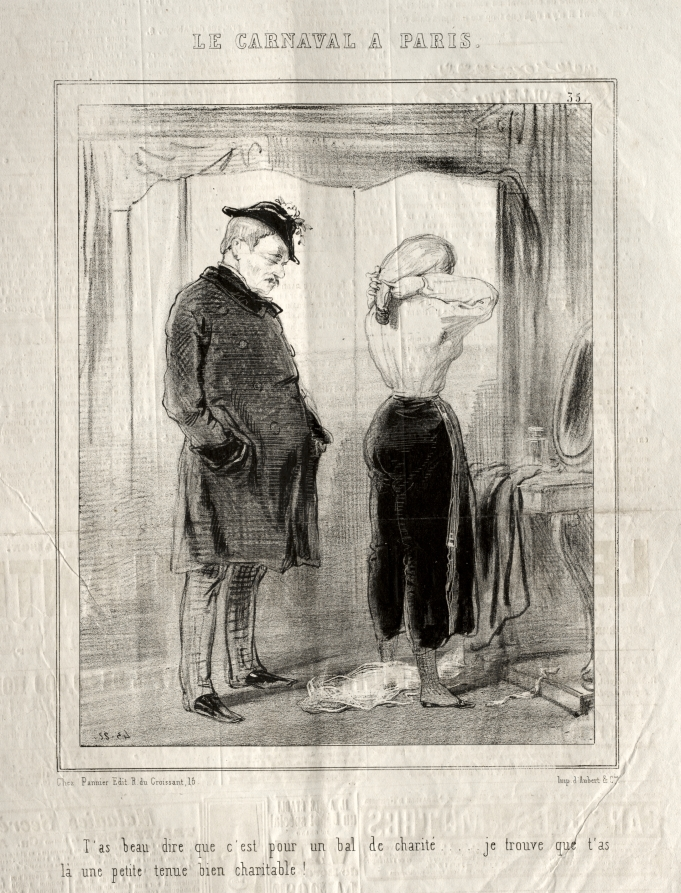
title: Carnaval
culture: France, 19th century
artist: Paul Gavarni (French, 1804–1866)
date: 1841–1843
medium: lithograph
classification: Print